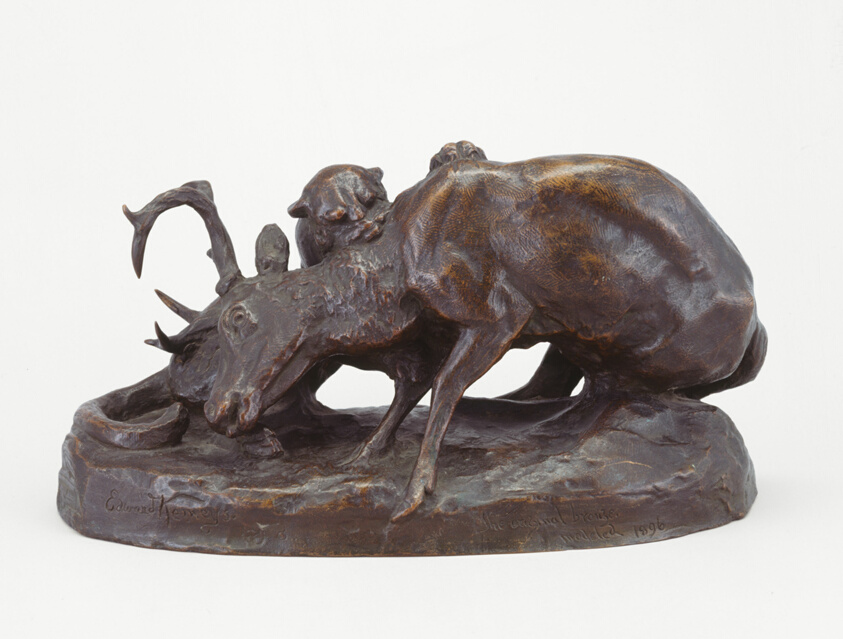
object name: Sculpture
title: Locked in Death (Bear and Panther)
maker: Edward Kemeys (American, 1843–1907)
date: Modeled 1896, cast 1896–99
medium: Bronze with brown patina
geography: United States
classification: sculpture; american arts